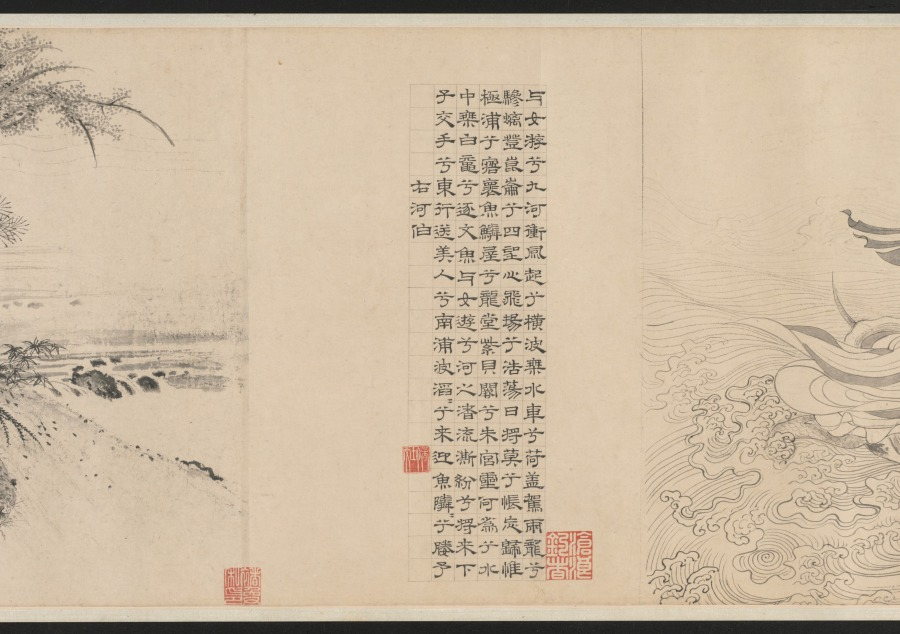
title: Nine Songs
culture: China, Yuan dynasty (1271-1368)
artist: Zhang Wo (Chinese, active c.1336–after 1364)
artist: Chu Huan (Chinese, active 1361)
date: 1361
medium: handscroll; ink on paper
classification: Painting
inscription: 7 colophons and 47 seals: 1 colophon, dated 1361, and 28 seals of Chu Huan 褚奐 (active c. 1361); 1 colophon, dated 1785, and 1 seal of Lu Shihua 陸時化 (1714-1779); 2 seals of Lu Yü-ch'ing (18th c.); 1 colophon, dated 1935, of Ye Gongchuo 葉恭綽 (1881-1968); 1 colophon, dated 1935, of Wu Hufan 吳湖帆(1894–1968); 1 colophon, dated 1938, and 1 seal of Wang Tongyu 王同愈 (1856-1941); 1 colophon, dated 1941, of Wu Huayuan 吳華源 (1893-1972); 1 colophon, dated 1942, and 9 seals of Xu Bangda 徐邦達 (1911–2012); 1 colophon, dated 1942, of Lang Jingshan 郎靜山 (1892-1995); 1 colophon, dated 1944, of Tang Yun 唐雲 (1910-1993); 6 seals of Wang Jiqian [C.C. Wang] 王季遷 (1907–2003).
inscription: Text of The Nine Songs written by Chu Huan at the end of each section.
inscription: 右離騷九歌圖，宋龍溟居士李公本，淮南張渥叔厚所畫妙絕當世。家藏請予書其辭目識于左。至正二十一年辛醜三月旦河南褚奐記。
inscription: Colophon by Lu Shihua 陸時化 (1714–1789): This scroll is fortunate to have been handed down from collections of the right people. Now, after 500 years, its condition is as good as when it was painted. I acquired this from Mr. Shen Guiyu [1673-1769], the President of the Board of Rites. The label is in his handwriting when he was 95 years old. I submit that Chu Huan (t. Shiwen) of the Yuan Dynasty was a native of Qiantang. His "seal" and li writings are in the style of Wu Rui. For example, in [Chu Kuei's] Ming ji lu [A list of masterpieces] is recorded the stele commemorating the restoration of the prefectural school of Kun-shan, the text of which was composed by Yang Weizhen in the twenty-first year of Zhizheng [1361]; and the calligraphy as well as the title in li style was by Chu Huan, who was at that time an assistant judge of the prefecture of Haining in the circuit of Hangzhou. Zhang Wo's zi is Shuhou (叔厚). His literary name is Zhen Qisheng (贞期生). According to [Gu Ying's] Yu shan cao tang ya jii, he liked to paint in the bai-miao or the "pure delineation" style after the method of Li Longmian [Li Gonglin 李公麟], which finds no peer among the ancient masters. This is agreed upon [by Pei Ch'iung] in his Qing jiang zhi who praised [Zhang Wo] as being quite learned and well-versed in many branches of the arts, especially figure painting. Recorded by Lu Shihua [The mountain dweller], listening to the pine, in the twelfth month of the yisi year [1785].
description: Painted in the baimiao, or fine-line drawing style, this ancient work demonstrates the literati’s use of abstract calligraphic brushwork for self-expression. The subject of the “Nine Songs”—songs associated with shamanistic rituals in the ancient Chu kingdom—had traditionally provided artists with myths and legends that they could explore and reinterpret in their own works.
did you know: Divided into eleven sections, the scroll contains illustrations by painter Zhang Wu followed by a transcription of the relevant verse by calligrapher Chu Huan.